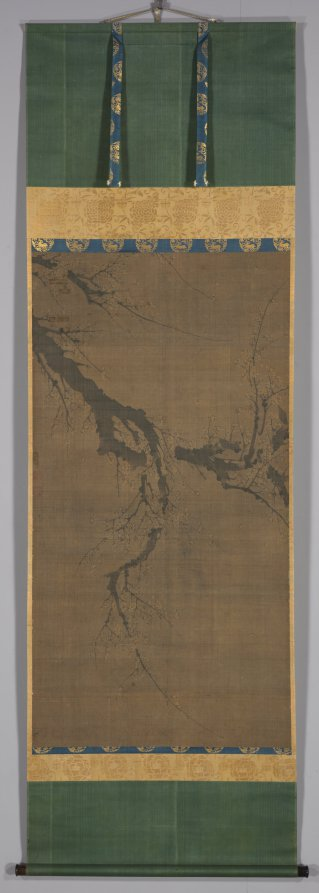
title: Ink Plum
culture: China, Ming dynasty (1368–1644)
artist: Peng Xu (Chinese, active 1488–1521)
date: late 1400s–early 1500s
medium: hanging scroll, ink on silk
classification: Painting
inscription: Artist's 2 seals at left middle edge of painting: Peng shi Te-mien; Shih-chu.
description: Seasonal paintings, including those depicting flowering plum trees in early spring, furnished scholars’ studios or other interior spaces in the house. Peng Xu is considered the foremost follower of the famous plum blossom painter Wang Mian (1287–1359) (see CMA 1974.26). The branches are brushed in the same vigorous manner leaving white streaks in the ink indicating the gnarled bark. The delicate blossoms are drawn in fine lines, while a gray wash covers the entire surface, only leaving the flower petals in reserve.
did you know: Plum trees blossom in the first months of the year; the delicate flowers endure the harsh winter frosts. A popular motif in Chinese ink painting, the plum symbolizes the winter season and is a harbinger of spring.